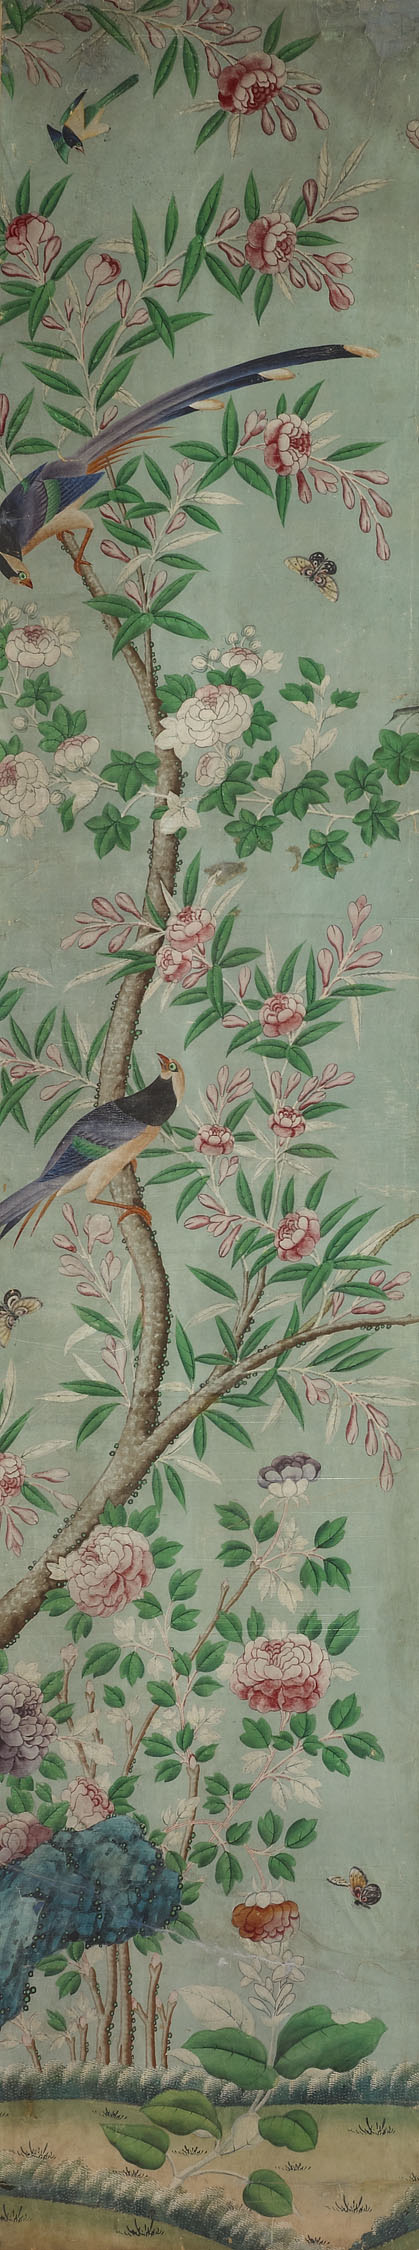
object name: Coverings and Hangings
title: Wall Panel: Birds and Flowers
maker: France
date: 1800/25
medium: Hand-painted paper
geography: France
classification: wallpaper; paper; european decorative arts